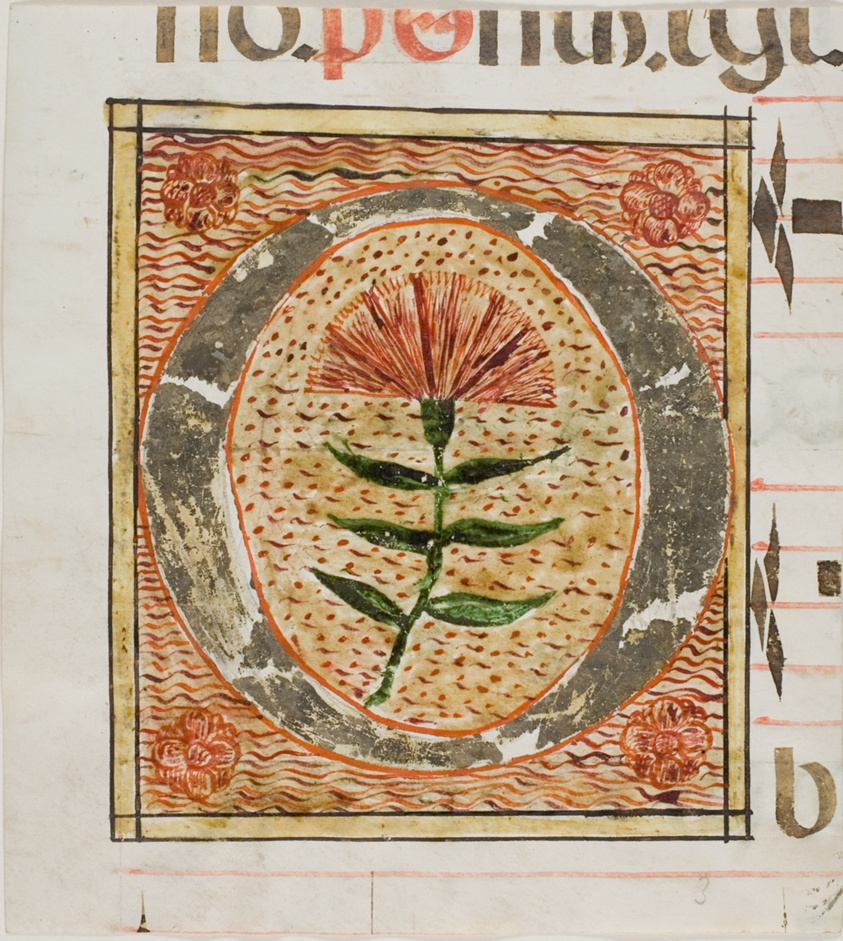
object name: Drawing and Watercolor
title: Decorated Initial "O" with Flowers from a Manuscript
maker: European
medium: Manuscript cutting in tempera, colored inks, and silver leaf, with Latin inscriptions in brownish black and red inks, ruled in red, on vellum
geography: Europe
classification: tempera; drawings (visual works); prints and drawing